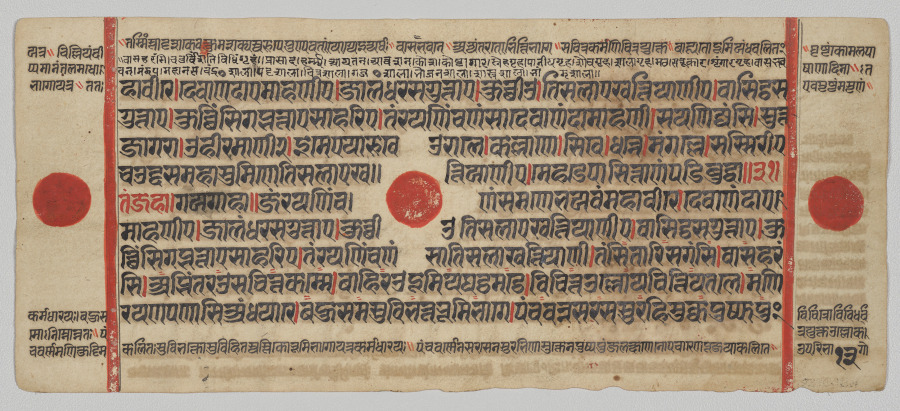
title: Text, Folio 13 (verso), from a Kalpa-sutra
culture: Western India, Gujarat, last quarter of the 15th century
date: c. 1475–1500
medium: Gum tempera, ink, and gold on paper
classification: Painting